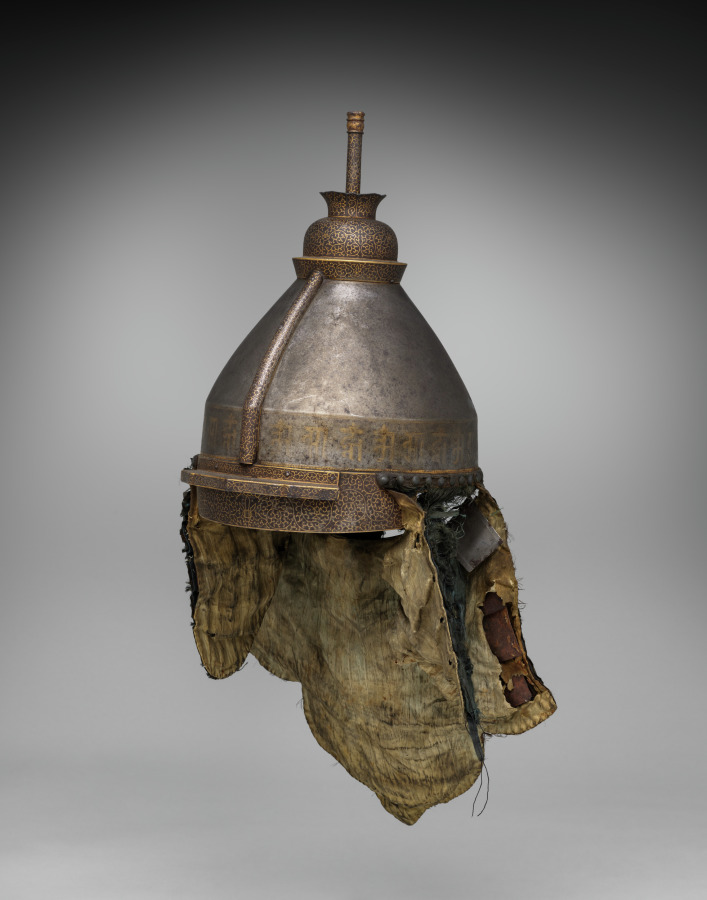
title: Helmet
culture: Sino-Tibetan, Ming dynasty (1368-1644)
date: 1368–1644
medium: iron inlaid with gold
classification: Arms and Armor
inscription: Tibetan inscription